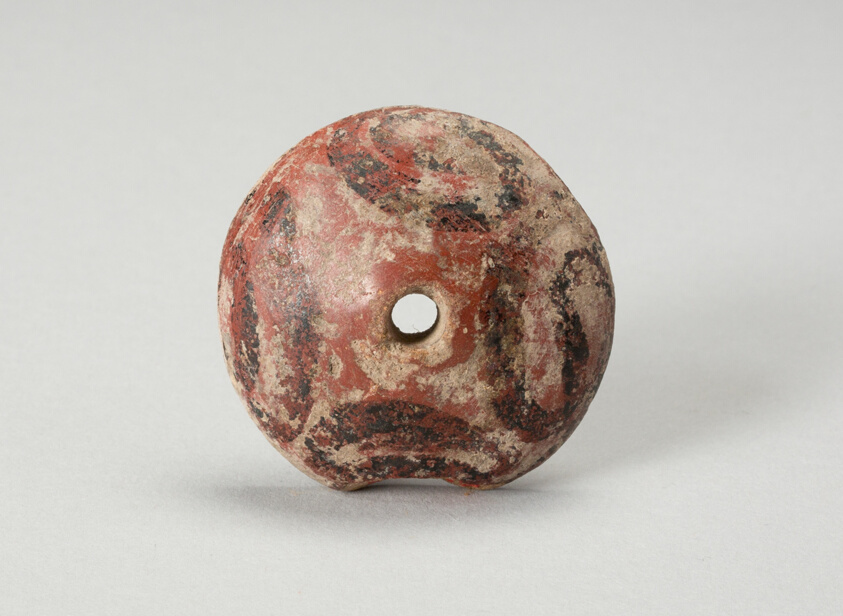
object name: Decorative Arts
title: Ear Ornament or Spindle Whorl with Modeled Design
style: aztec, mesoamerican, Pre-Columbian, americas, Arts of the Americas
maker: Aztec (Mexica) (Valley of Mexico, Mexico)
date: 1450–1521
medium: Ceramic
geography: Valley of Mexico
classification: earthenware; american decorative arts; ceramics; jewelry; art of the americas; decorative arts